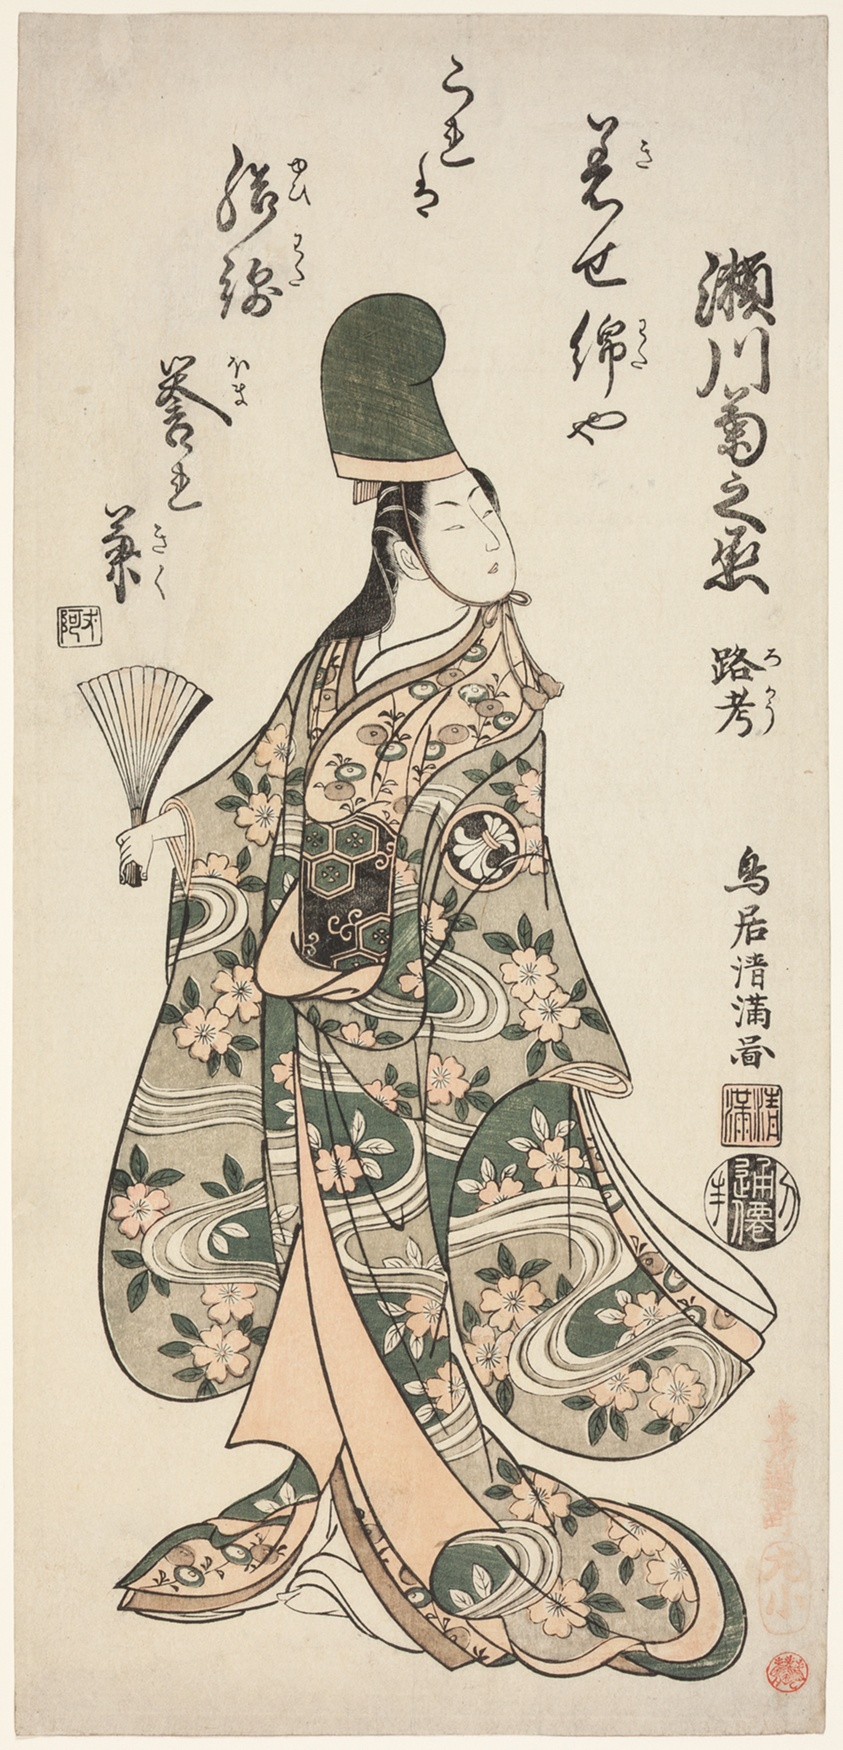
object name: Print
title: The Actor Segawa Kikunojo II as Shirabyoshi Renri in the play "Imayo Dojoji" performed at the Ichimura Theater in the eleventh month, 1756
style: Japanese (culture or style)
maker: Torii Kiyomitsu I (Japanese, 1735–1785)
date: 1756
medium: Color woodblock print; o-hosoban, benizuri-e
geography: Japan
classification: woodblock print; print; asian art